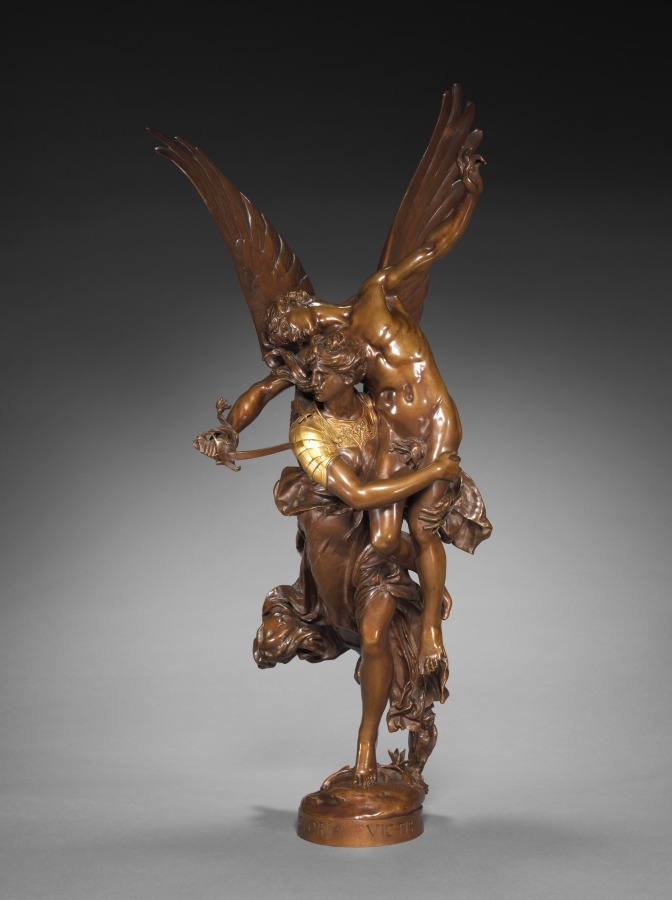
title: Gloria Victis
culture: France, 19th century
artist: Antonin Mercié (French, 1845–1916)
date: c. 1880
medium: bronze with gilding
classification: Sculpture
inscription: Signed near foot at right: "A. MERCIE."; inscribed rear: "F. BARBEDIENNE. FONDEUR."; inscribed front of base: "GLORIA VICTIS."